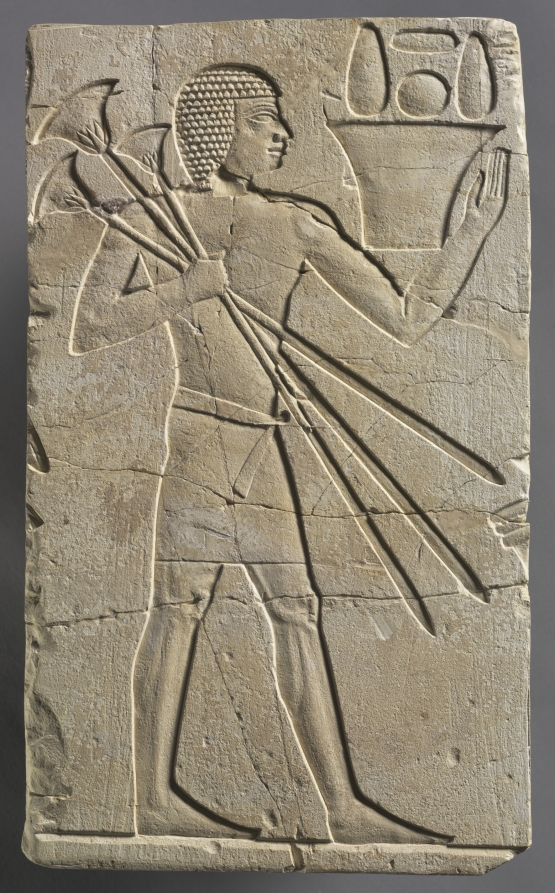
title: Male Offering Bearer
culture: Egypt, Thebes, Late period (715–332 BCE), Dynasty 26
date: c. 667–647 BCE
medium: limestone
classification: Sculpture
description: Carved in sunken relief, this limestone slab shows a male offering bearer walking to the right. He holds three papyrus stalks in his right hand and a basket containing four loaves of bread in his left. Although the loaves appear above the basket, they should be understood as its contents.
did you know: This offering bearer was part of a larger procession, with traces of objects on either side.